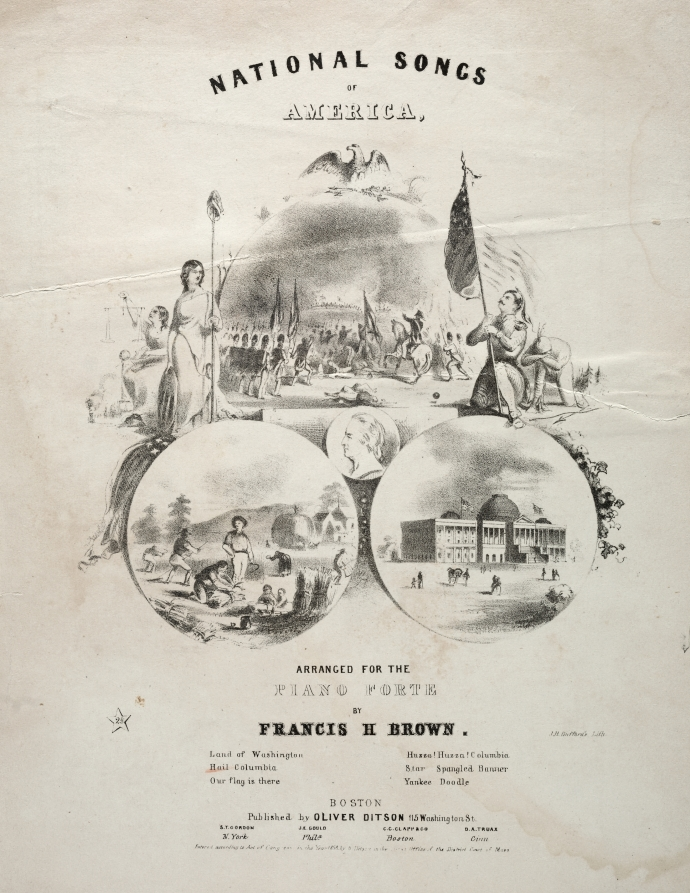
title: National Songs of America - Sheet Music Cover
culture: America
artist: Winslow Homer (American, 1836–1910)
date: c. 1856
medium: lithograph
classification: Print